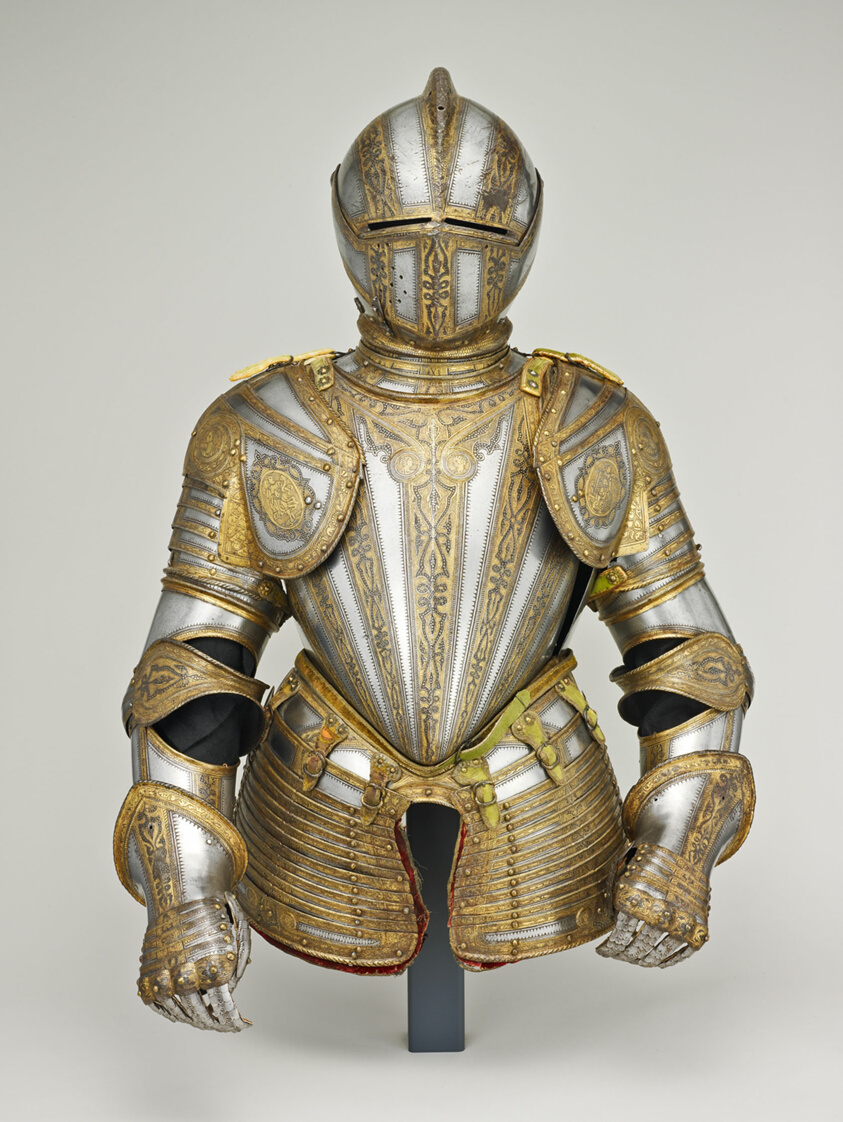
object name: Armor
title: Gorget and Close Helmet for Foot Tourney at the Barriers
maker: Italian, Milan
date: 1575/80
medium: Steel with gilding, brass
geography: Milan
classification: suit; armor; arms and armor